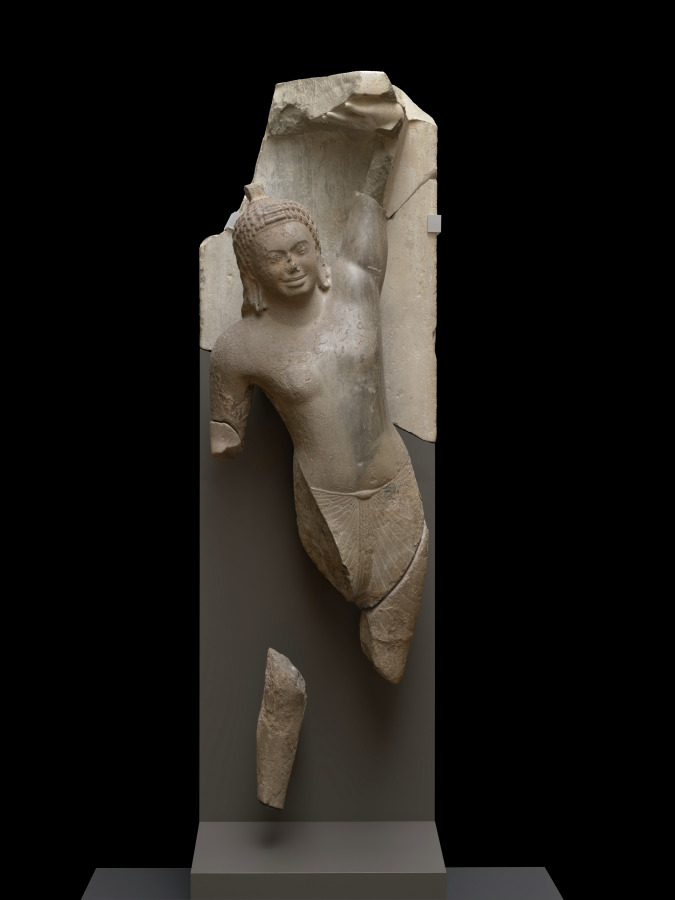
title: Krishna Lifting Mount Govardhan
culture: Southern Cambodia, Takeo Province, Phnom Da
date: c. 600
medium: Sandstone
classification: Sculpture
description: This masterwork of early Cambodian sculpture shows the Hindu god Krishna effortlessly holding aloft a mountain to protect his fellow villagers and herds from torrential storms sent by a jealous old god. It is one of eight monumental monolithic figures recovered from a two-peaked mountain in the floodplains of the Mekong River delta, on the outskirts of the ancient urban center of Angkor Borei.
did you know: Gold earrings were once fastened to the sculpture using holes in the figure's earlobes.